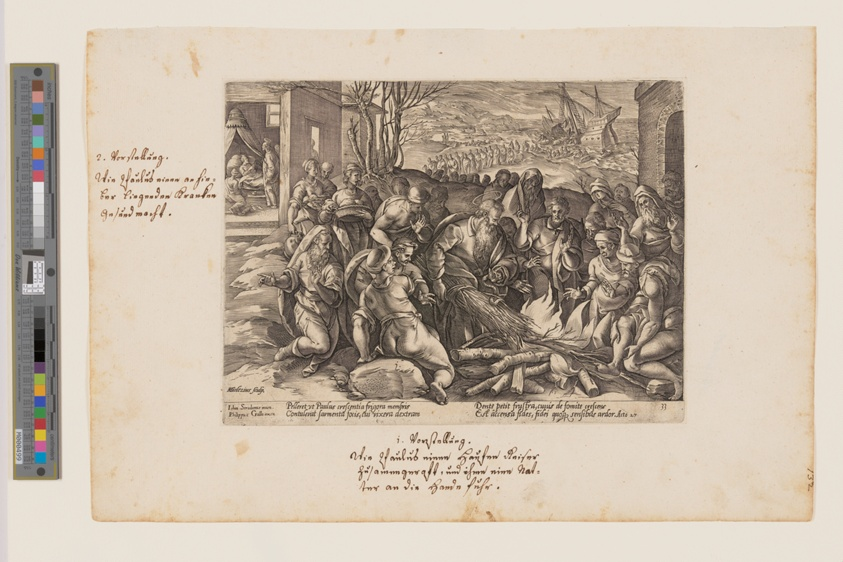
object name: Print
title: St Paul Bitten by the Viper, from Acta Apostolorum (The Acts of the Apostles)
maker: Hendrick Goltzius (Dutch, 1558–1617); after Jan van der Straet (Flemich, 1523–1605)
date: 1582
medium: Engraving on ivory laid paper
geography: Netherlands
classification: engraving; paper; print; prints and drawing